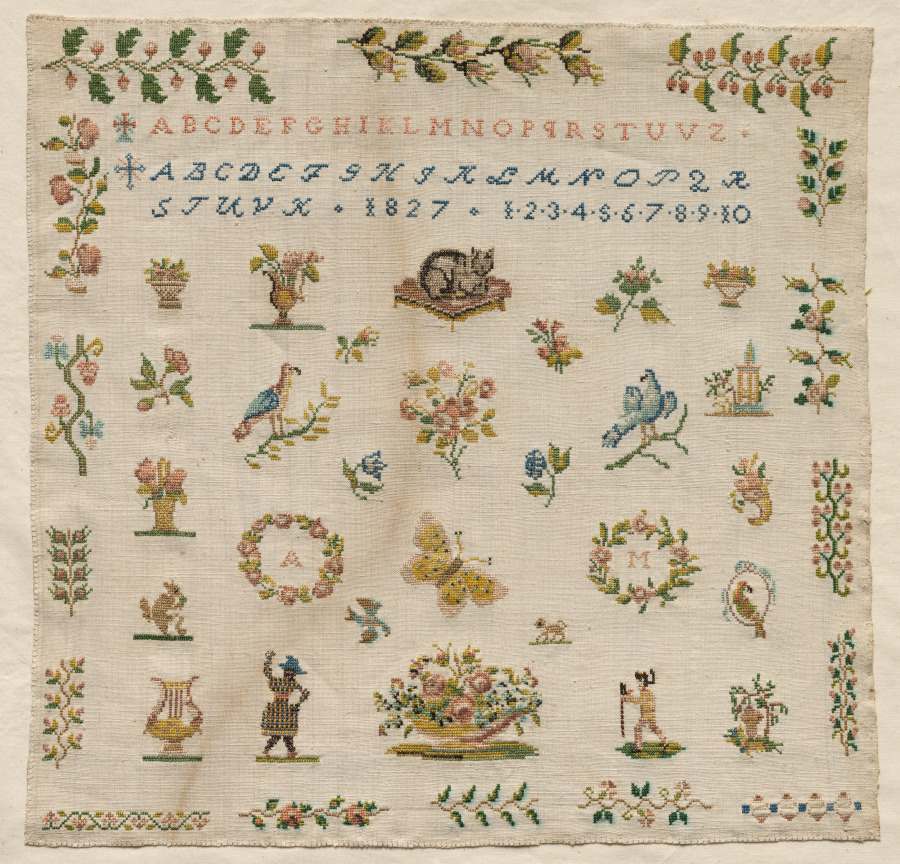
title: Sampler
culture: Italy, 19th century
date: 1827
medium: embroidery; silk on linen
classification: Sampler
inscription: two sets of alphabets (a few letters omitted) and numerals from one to ten above; dated "1827"; initials "A.M." in wreath.